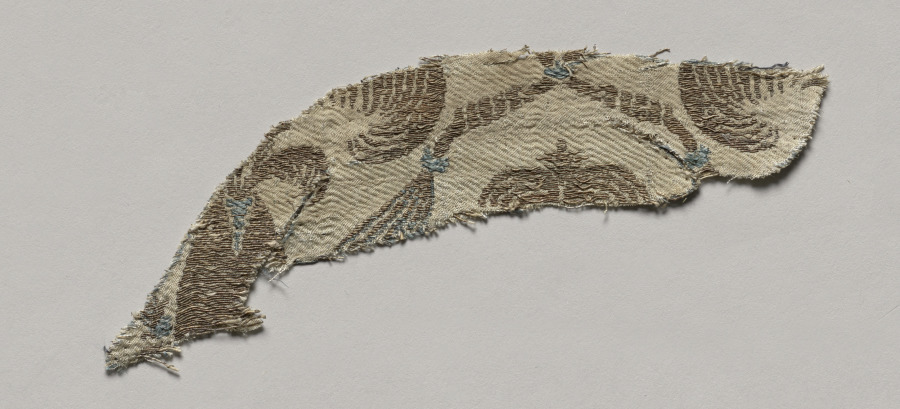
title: Silk Fragment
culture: Italy, last third of the 14th century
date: 1360–1399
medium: lampas weave, silk and gold thread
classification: Textile